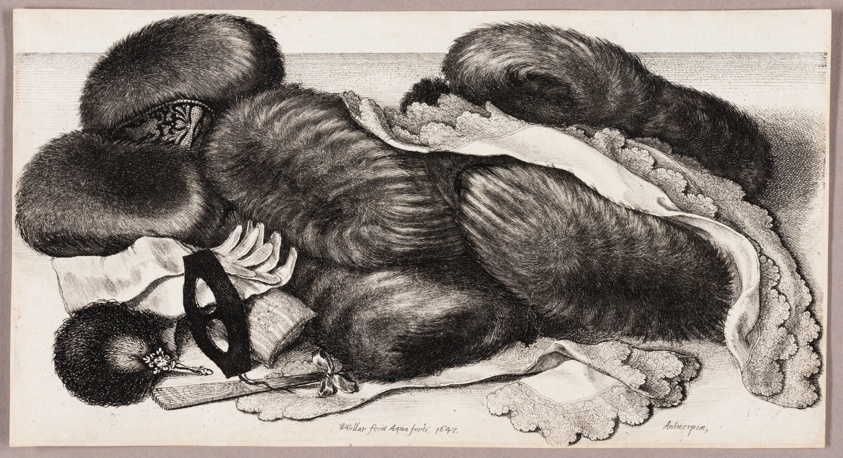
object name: Print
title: Still-Life with a Group of Muffs, a Pair of Gloves, and Two Kerchiefs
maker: Wenceslaus Hollar (Bohemian, 1607-1677)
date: 1647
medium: Etching in black on cream laid paper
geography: Bohemia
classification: print; prints and drawing